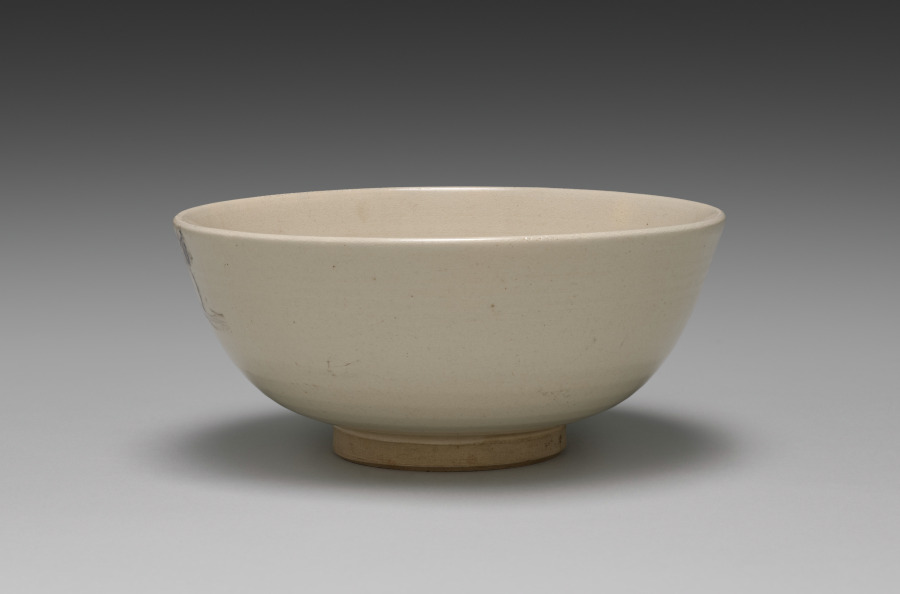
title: Bowl with Chrysanthemums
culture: Japan, Taishō period (1912–26) or Shōwa period (1926–89)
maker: Seifū Yohei IV (Japanese, 1872–1951)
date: 1914–46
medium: Stoneware with underglaze iron oxide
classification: Ceramic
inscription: 清風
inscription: 菊画/ 鉢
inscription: The inside of the box lid has a seal indicating that the bowl was included in a renewal opening of the gallery Manjudo in Tokyo.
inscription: 清風造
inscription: 成山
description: The chrysanthemums in underglaze iron oxide of this bowl of Kyoto ware have a casual feel, which is emphasized by the bowl's shape. When held, the its slightly ridged body would gently massage one’s palms, contributing to the sensory, tactile experience of the piece and possibly generating a sense of comfort and ease. The inside of the box lid has a seal indicating that the bowl was included in a renewal opening of the gallery Manjudo in Tokyo.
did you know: Stoneware works of this type are classified as Kyoto ware, after the city where the style developed.